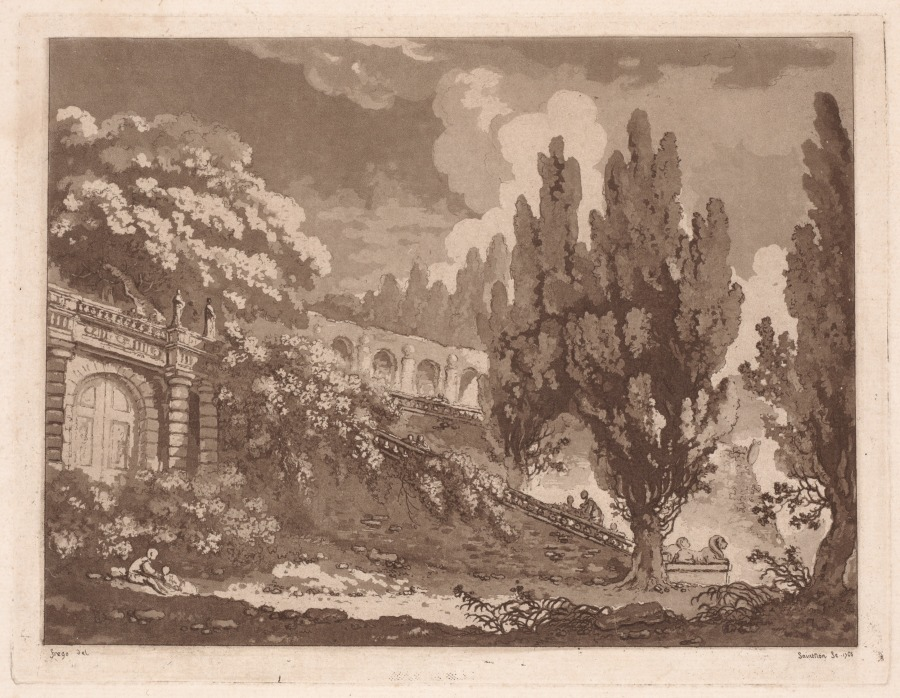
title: Stairs in an Italian Garden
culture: France, 18th century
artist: Jean-Claude-Richard Saint-Non (French, 1727–1791)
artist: after Jean-Honoré Fragonard (French, 1732–1806)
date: 1766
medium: etching and aquatint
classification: Print